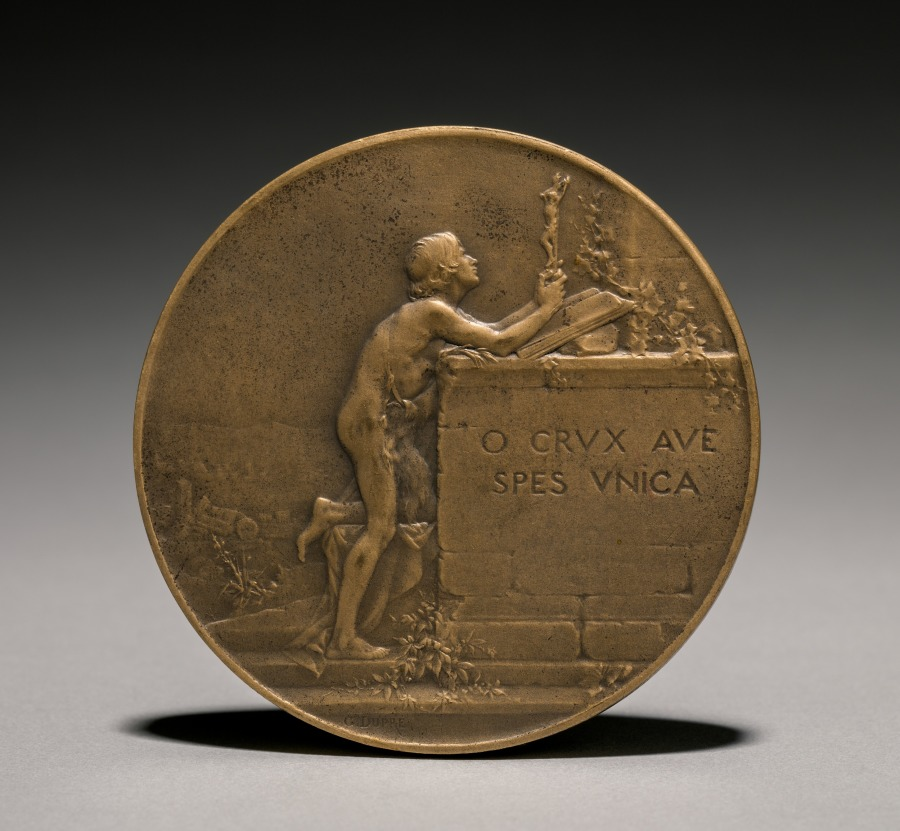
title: Medal (reverse)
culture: France, 19th century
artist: Jules Dupré (French, 1811–1889)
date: 1800s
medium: bronze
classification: Metalwork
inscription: "O Crux ave spes unica."